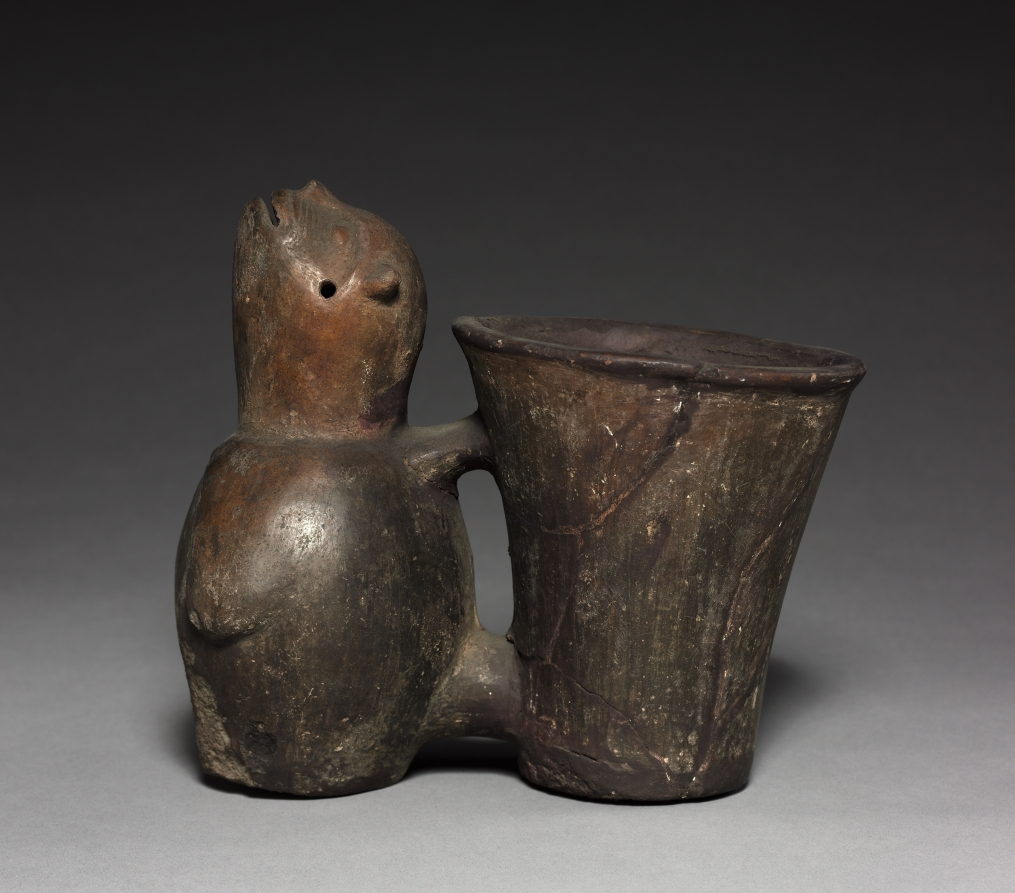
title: Vase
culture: Peru, Huacho Ware?, early 9th Century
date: c. 800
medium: black ware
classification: Ceramic